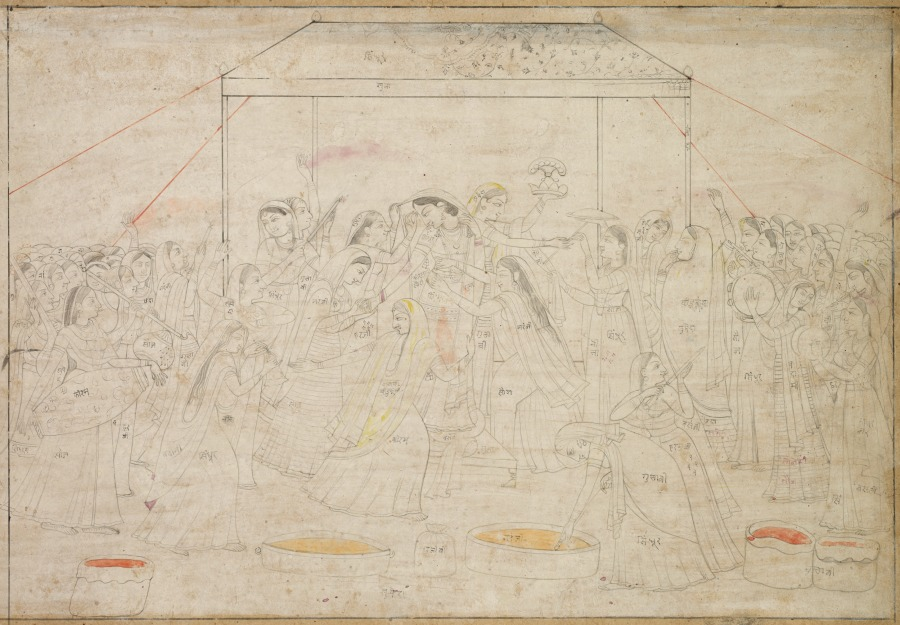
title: Krishna being dressed in women’s clothes for the spring festival Holi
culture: Northern India, Pahari kingdoms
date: c. 1790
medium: Ink and gum tempera on paper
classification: Painting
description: The festival of Holi, which celebrates the arrival of spring, is a time of play when transgressing boundaries is allowed as part of the reckless joy and abandon of the day. Vats of colored water and powder in the foreground are used to fill handheld pumps to shoot colors at one another. The young women of the cowherd village where Krishna grew up gather around, fill their pumps, begin to play music, and cheekily dress Krishna as one of them. Radha, his favorite, holds his crown up high as she takes it away. He indulges them, just as he indulged all his devotees by taking on a human form. This unfinished work reveals the process of creating an Indian painting. The drawing was probably made by the master of the atelier who would have added the color notations, then given it to a colorist to paint. Another artist might have finished the faces and another the gold details before the work came back to the master for its finishing touches and final approval.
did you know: A few preliminary patches of color in the foreground indicate the palette intended to be applied to the entire painting.